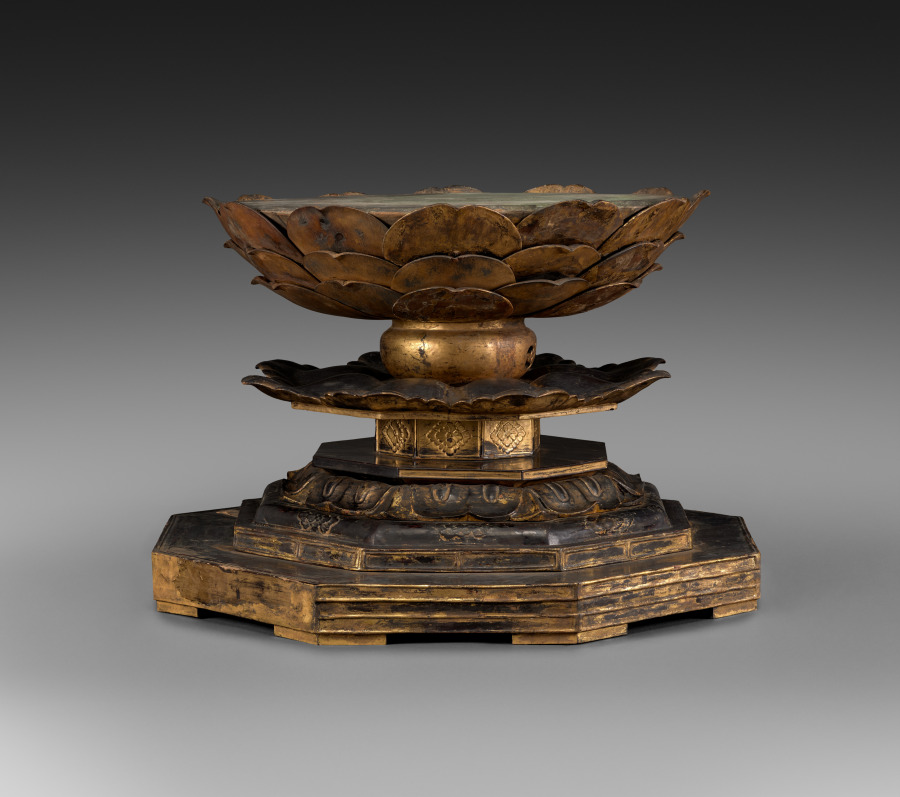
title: Seated Buddha (lotus pedestal)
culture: Japan, Heian period (794–1185)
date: 1100s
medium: gilded wood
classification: Sculpture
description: Composed of a number of hollowed-out pieces of wood that were then covered with lacquer and gilding, this sculpture would have served as the principal image of worship in a Buddhist temple hall. The Buddha Yakushi resides in the Lapis Lazuli Paradise of the East, and heals all diseases, including the ailment of ignorance. His left hand once held a medicine jar, while his right hand gestures reassurance. Seated on a lotus pedestal and backed by a mandorla and halo, the Buddha may have once been flanked by the bodhisattvas of the Sun and Moon, Nikkō and Gakkō, and protected by the Twelve Divine Generals, or Junishinshō.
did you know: This figure is depicted with a mudra, or hand gesture, that means "have no fear."